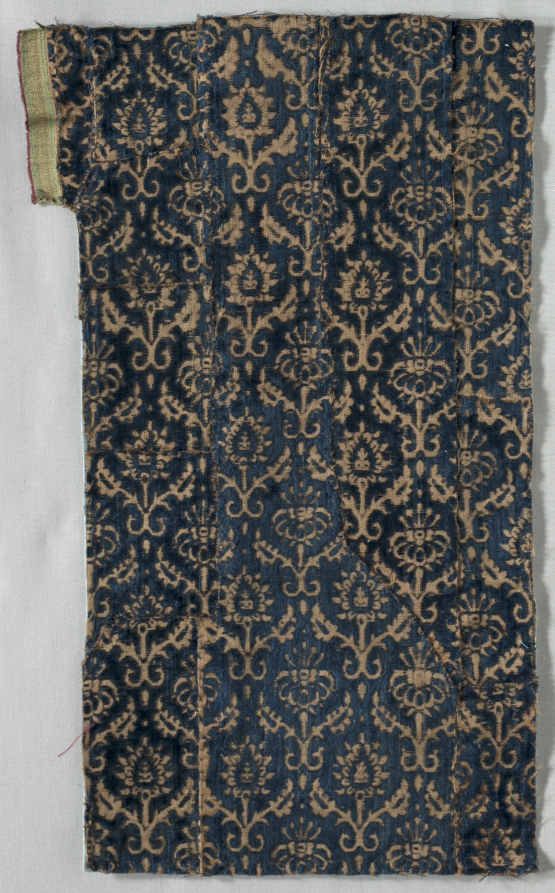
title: Velvet Fragment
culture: Italy, 16th-17th century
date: 1500s-1600s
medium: velvet (cut and uncut)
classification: Velvet